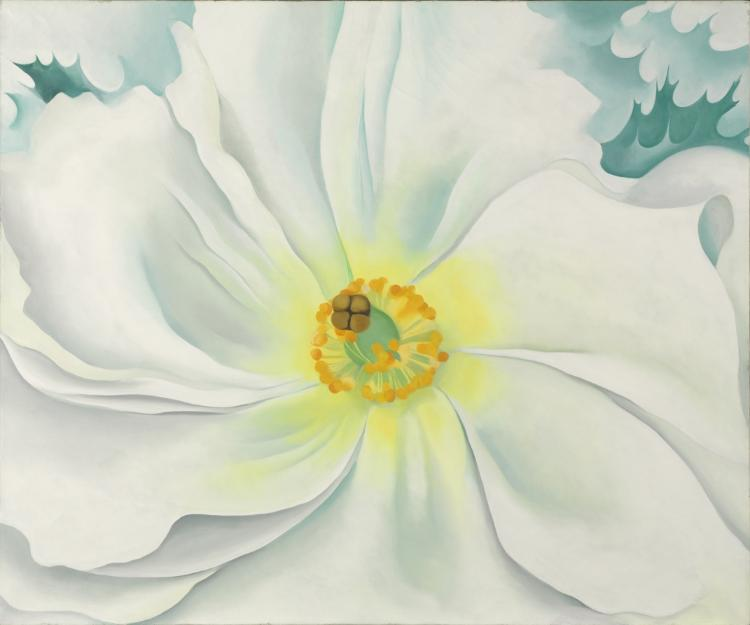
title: White Flower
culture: America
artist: Georgia O'Keeffe (American, 1887–1986)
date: 1929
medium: oil on canvas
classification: Painting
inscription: Stretcher: "White Flower -- 1929 / by Georgia O'Keeffe" (AS, graphite) Backing: "White Flower -- 1929 (oil) by Georgia O'Keeffe Price $8,000 To be returned to Geo. F. Of 126 W 57th NY NY ['To be returned...NY' twice]" (AS, AAP2, black ink)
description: O’Keeffe is best known for close-up flower subjects whose magnified forms fill the entire space of each canvas. Likely inspired by similar compositions in modern photography, these images are not only celebrations of natural forms, but also striking essays in abstract design. Although many critics interpreted O’Keeffe’s flower paintings as reflections of femininity in general and female sexuality in particular, the artist strongly opposed such readings. Throughout most of her career, she frequently attempted to persuade others to discuss her work without referring to her gender, writing on one occasion, “I have always been very annoyed at being referred to as a ‘woman artist’ rather than an ‘artist.’”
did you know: This was the first flower painting by Georgia O'Keeffe to be purchased by an art museum.